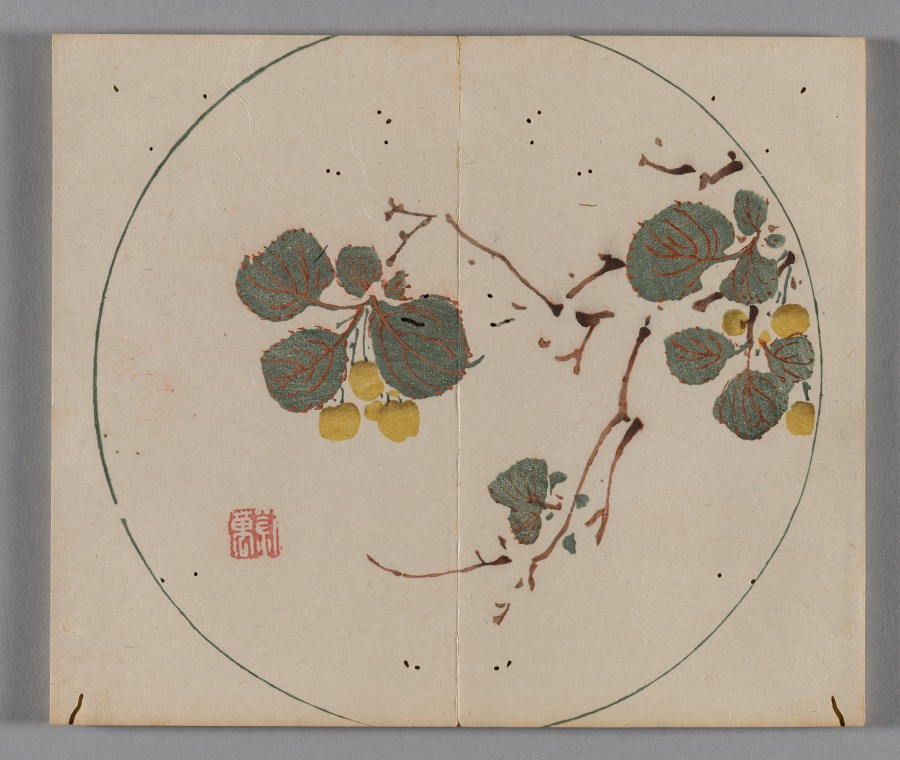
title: Ten Bamboo Studio Collection of Calligraphy and Painting: Round Fans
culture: China, Qing dynasty (1644-1911)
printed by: Hu Zhengyan (Chinese, c. 1584–1674)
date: 1633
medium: Woodblock-printed book; ink and colors on paper; first edition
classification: Print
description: Color printing reached a level of perfection in the early 1600s, as seen in this Ten Bamboo Studio Collection of Calligraphy and Painting and the Mustard Seed Garden Manual of Painting (printed 1679 and 1701). The painterly quality, precision in registering (aligning) the woodblocks, and harmonious colors made them the most successful color print editions in Chinese history. Both editions were printed and compiled in Nanjing, spread nationwide, and had a great impact on the arts in Japan and Korea.